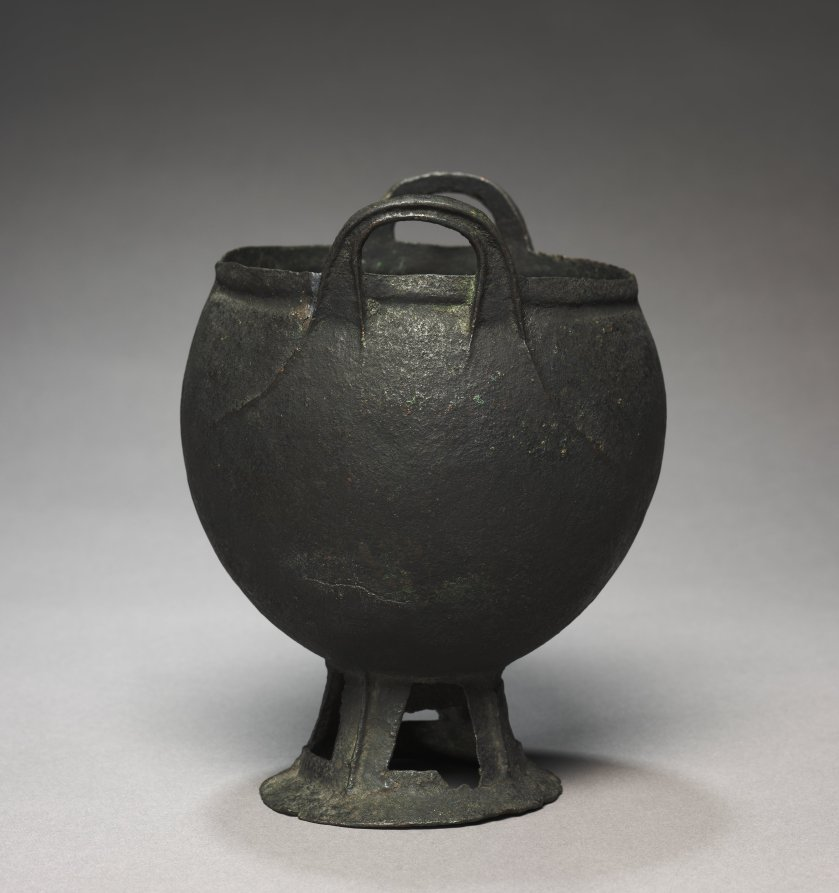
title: Cauldron on High Rounded Foot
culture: China, Ordos Region, Han dynasty (202 BCE–220 CE)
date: 200–1 BCE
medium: bronze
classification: Metalwork